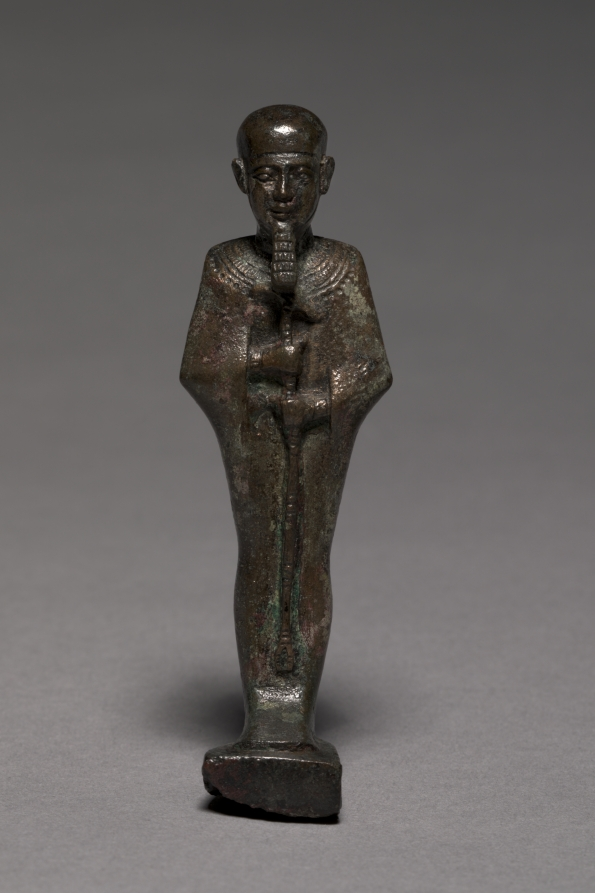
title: Statuette of Ptah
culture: Egypt, Late period (715–332 BCE), Dynasty 26 or later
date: 664–525 BCE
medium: bronze, solid cast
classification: Sculpture